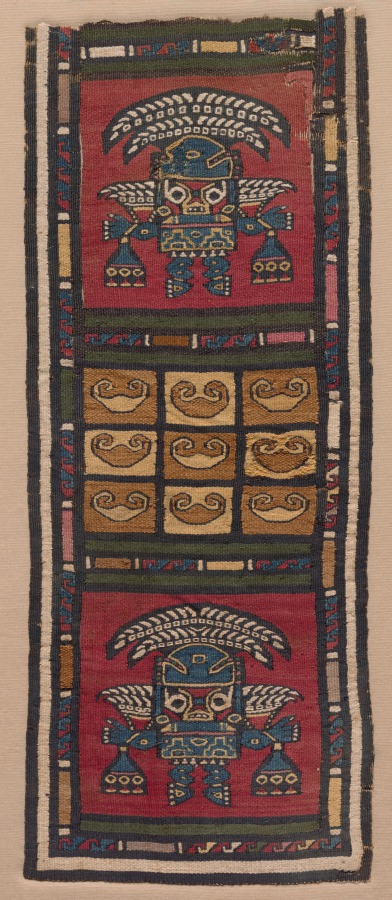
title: Tapestry Fragment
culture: Peru, North Coast, Lambayeque (Sicán) people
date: 700–1370s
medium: camelid fiber and cotton, tapestry weave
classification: Tapestry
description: The prominent figure with an elaborate headdress duplicated on this brightly colored fragment is known today as a “Lord,” a term that reveals uncertainty about his identity but confidence in his prestige. Whether a king or a deity, he was crucially important to the north coast Lambayeque (lahm-buy-yek-kay) (Sicán) people, who often portrayed him in a wide range of media. The geometric motif that repeats in the nine central squares is unidentified.